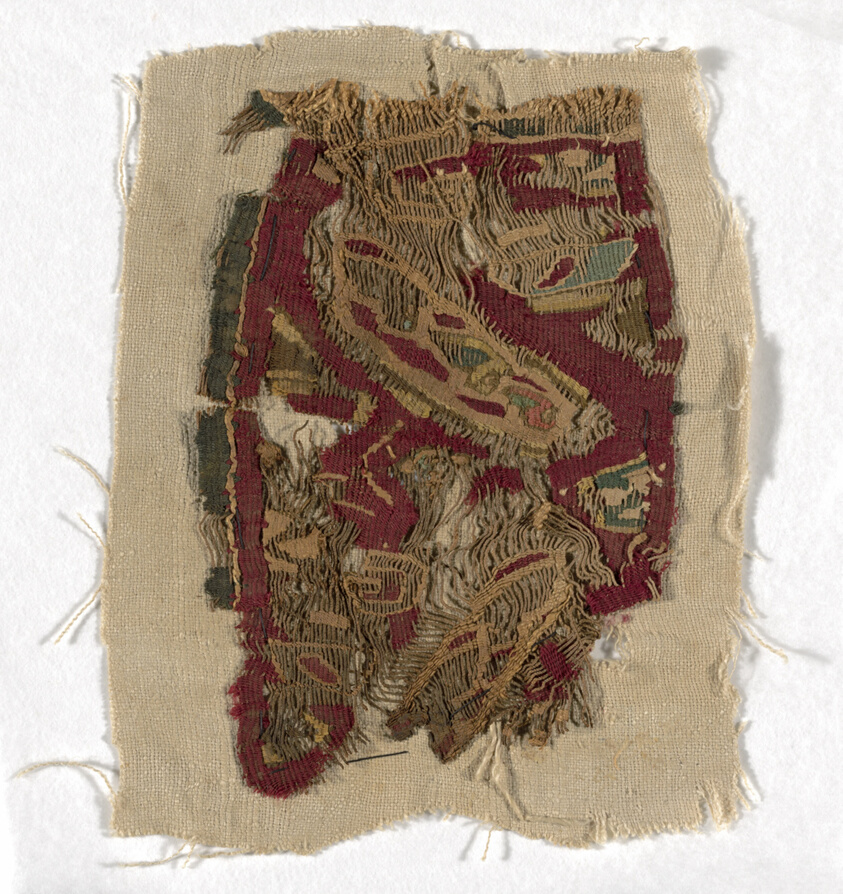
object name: Textile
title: Fragment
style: roman period (egyptian)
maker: Coptic (Egypt)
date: Roman period (30 B.C.– 641 A.D.)/Arab period (641–969), 4th/8th century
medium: Linen and wool, tapestry weave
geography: Egypt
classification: textile; weaving